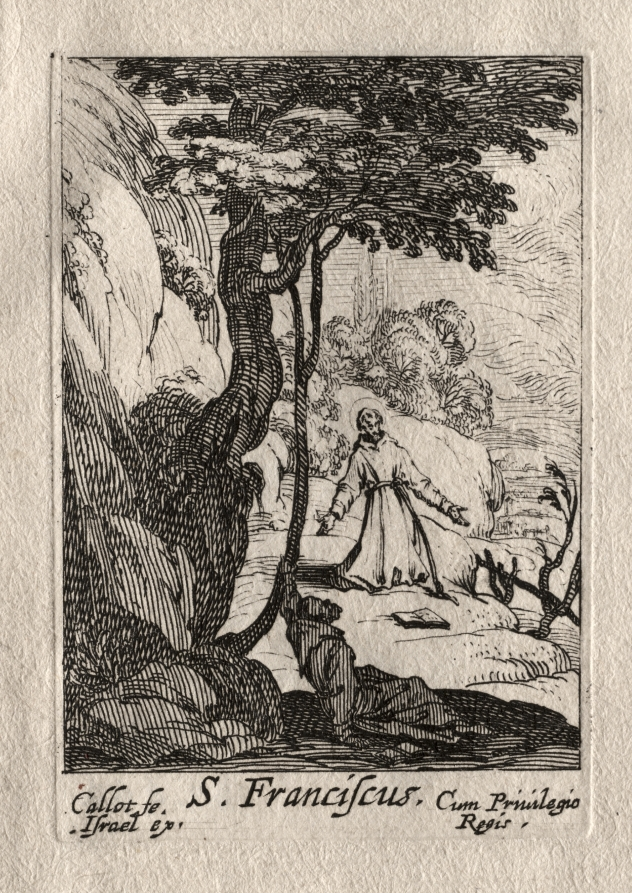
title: Les Penitents: St. François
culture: France, 17th century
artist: Jacques Callot (French, 1592–1635)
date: ca. 1632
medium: etching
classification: Print